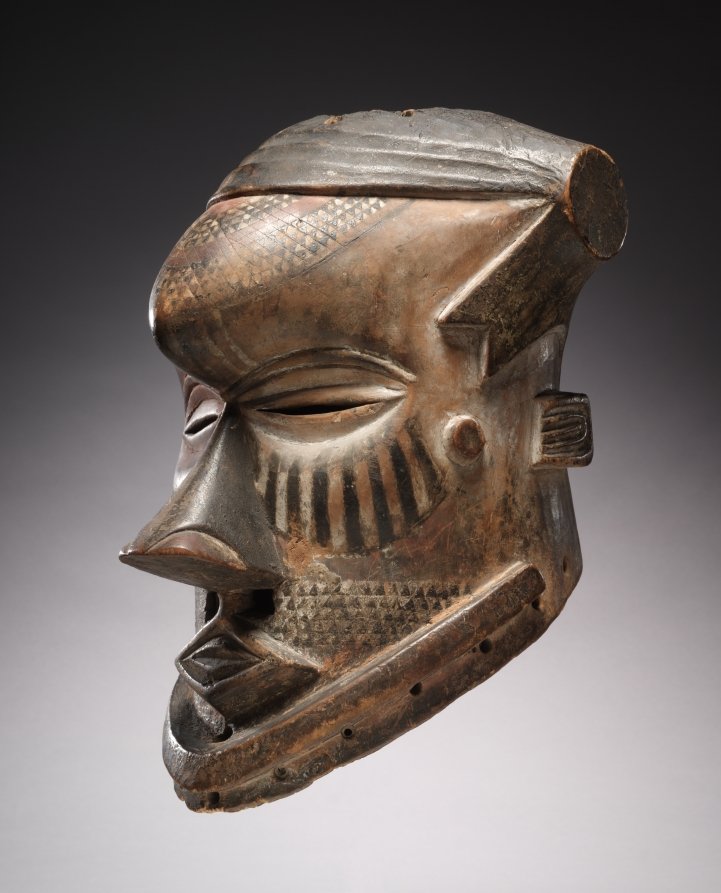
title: Mask (Bwoom)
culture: Africa, Central Africa, Democratic Republic of Congo, Kuba-style carver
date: mid- to late 1800s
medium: Wood and paint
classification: Mask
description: Among the Bushoong, the central Kuba group, the mask known as bwoom—most typically identified as the head of a hunter-gatherer—forms a triad with a female mask and another male mask. All three are protagonists in the reenactment of the foundation of the Kuba kingdom. Outside the capital, however, bwoom appears in different non-royal contexts, such as the men’s initiation society.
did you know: Imagine this mask topped with eagle feathers; they would have been added only on special occasions when it was performed.